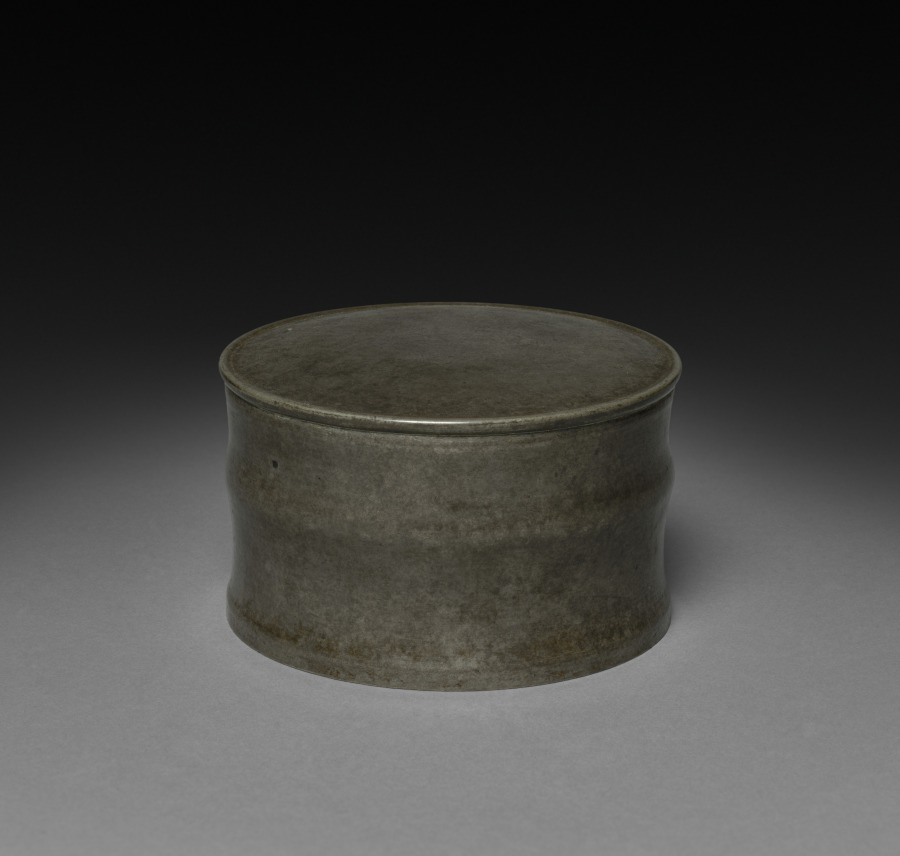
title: Jar (lid)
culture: Japan, Edo period (1615–1868)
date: 1600s-1800s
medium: pewter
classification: Metalwork